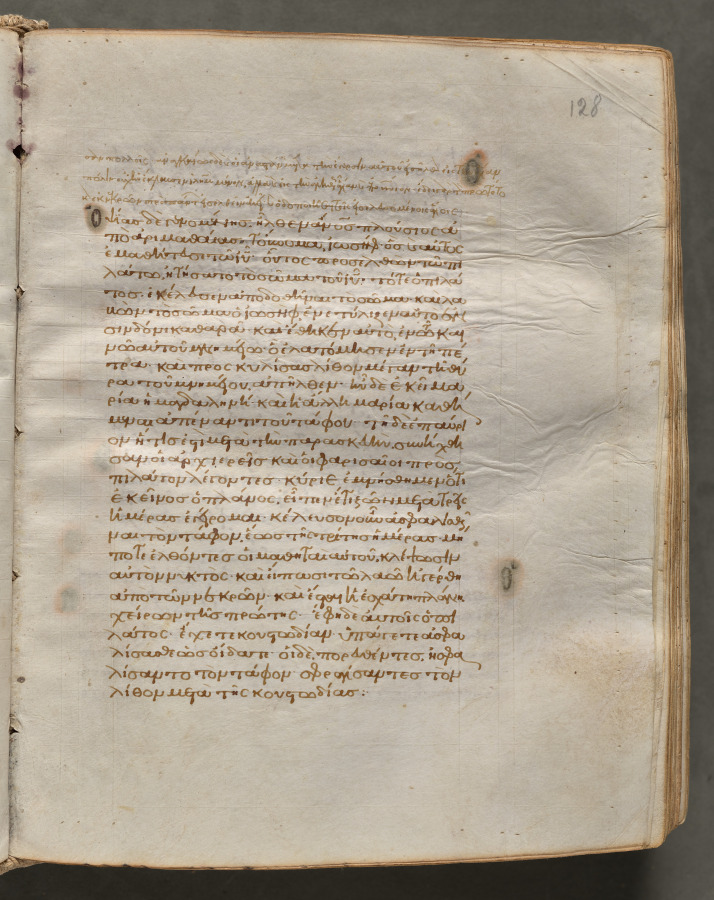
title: Text, folio 128 (recto), from a Gospel Book with Commentaries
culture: Byzantium, Constantinople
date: c. 1000–1100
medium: ink, tempera, and gold on vellum; leather binding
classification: Bound Volume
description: Each of the four gospels in this book opens on a page with brilliantly illuminated borders depicting the author of the text as well as birds-principally peacocks, symbols of the immortality of the soul-and fountains, representing the fountain of life and the salvation of the soul. This volume consists of 428 leaves with texts in Greek. Its level of sophistication suggests that it was probably written and decorated in a monastery in Constantinople.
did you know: Gospel Books were carried in procession through Byzantine churches.